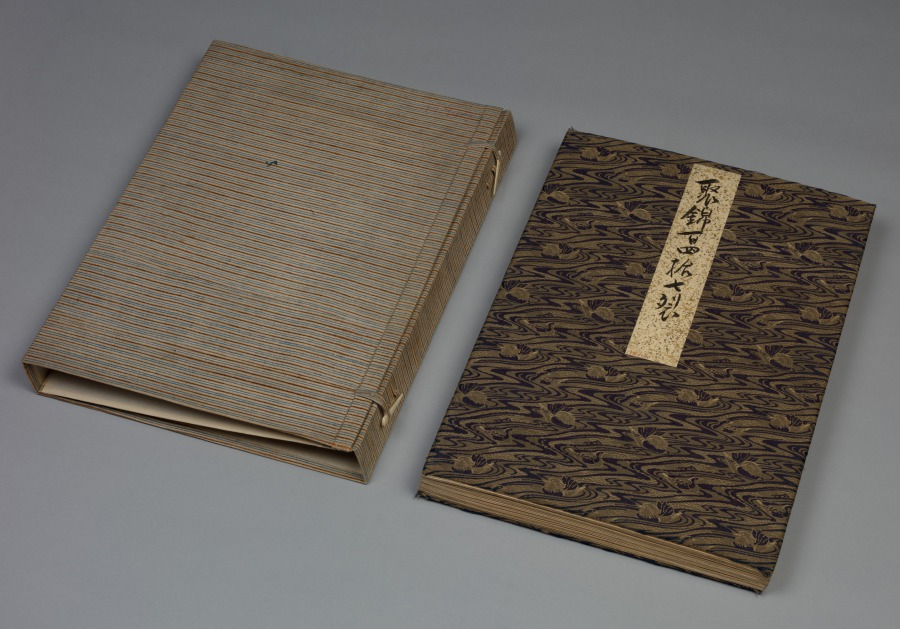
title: Album of Textile Samples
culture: Japan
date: 1790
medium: silk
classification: Textile